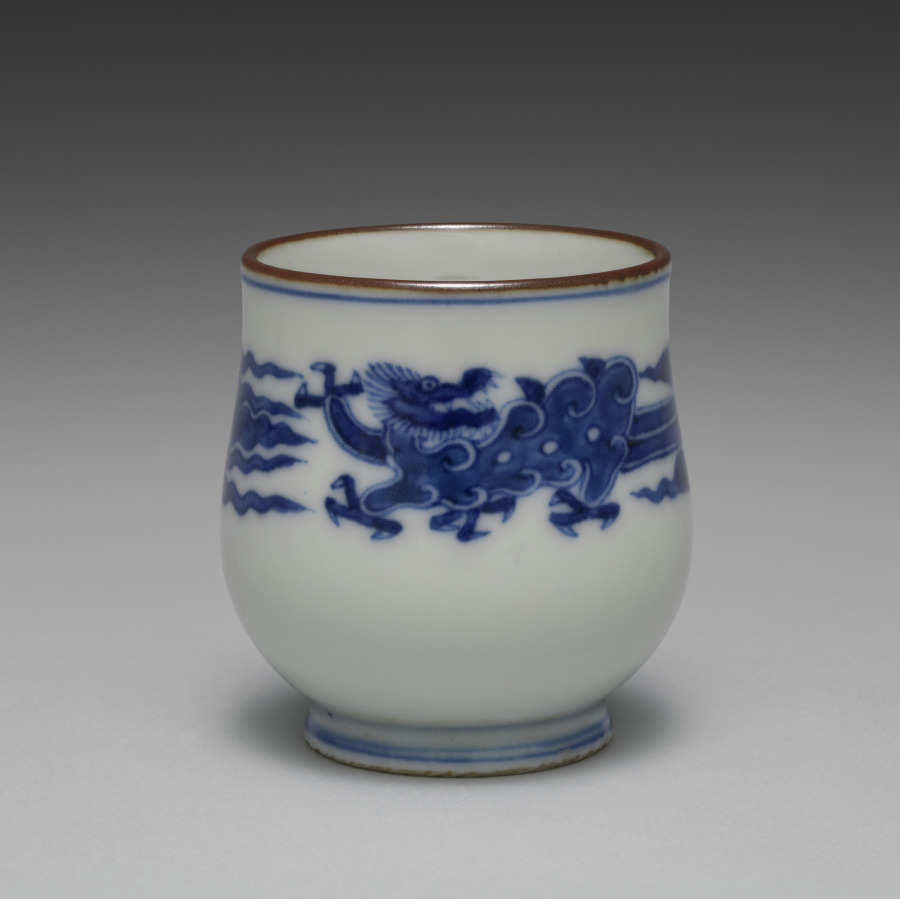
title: Cup from Sake Cups with Dragons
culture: Japan, Meiji period (1868–1912)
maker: Seifū Yohei III (Japanese, 1851–1914)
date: c. 1893–1914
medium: One from a set of six sake cups; porcelain with underglaze blue and iron oxide rims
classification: Ceramic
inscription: 大日本清風造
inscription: 清風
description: Each of these sake cups pictures two backward-looking dragons. The highly stylized creatures resemble jade carvings.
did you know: Seifū Yohei III was inspired by the Chinese mythical animals that were common on porcelain objects made at Jingdezhen in China during the Ming dynasty (1368–1644) and then exported around the world.